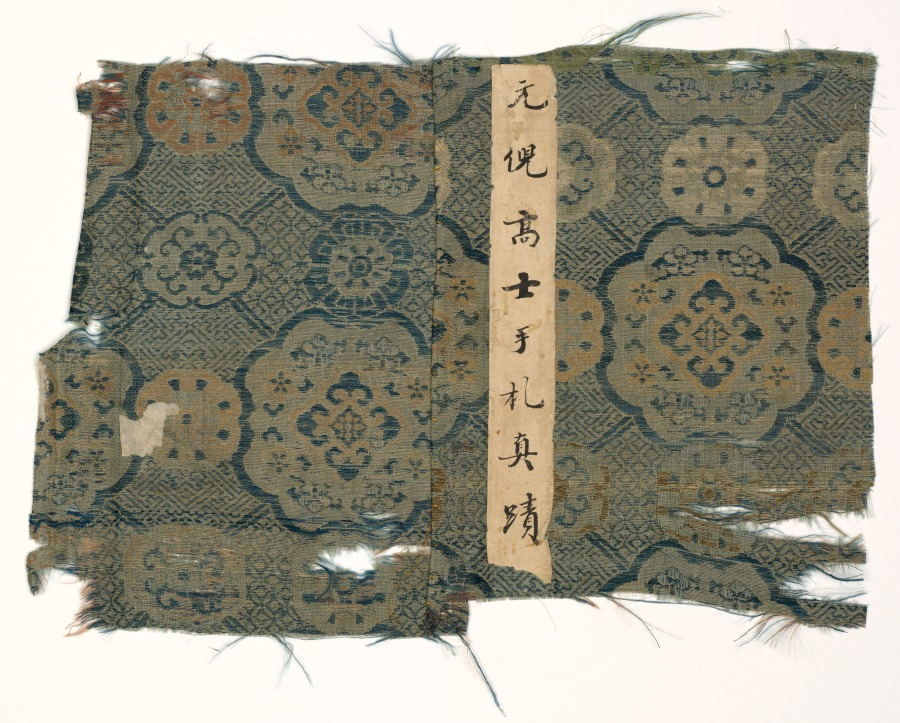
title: Fragment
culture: China, 19th century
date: 1800s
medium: silk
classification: Textile